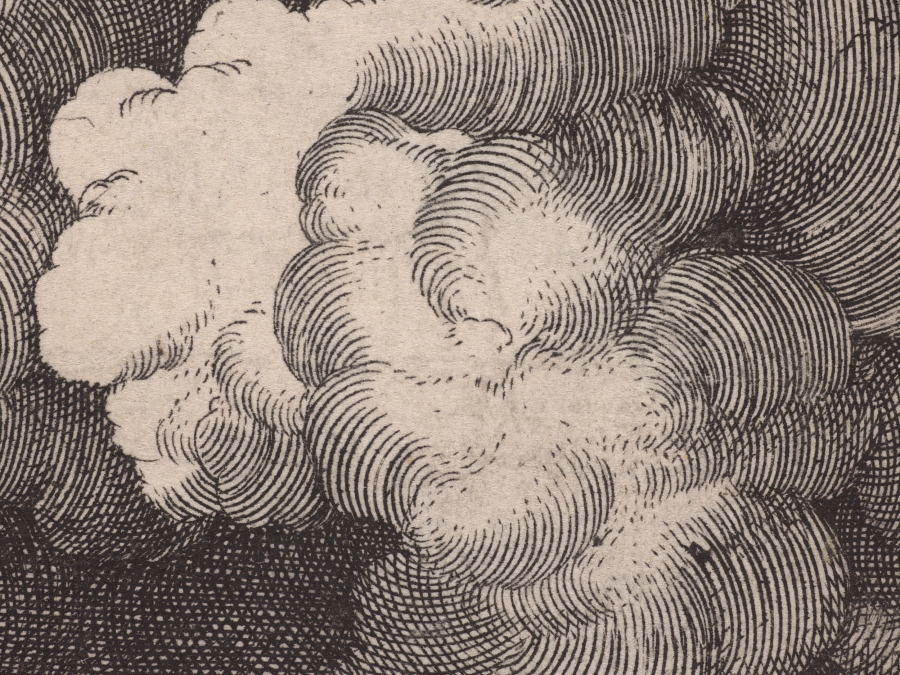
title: Christ, the Virgin, and St. John the Baptist with Saints Paul and Catherine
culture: Italy, 16th century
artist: Marcantonio Raimondi (Italian, 1470/82–1527/34)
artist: after Raphael (Italian, 1483–1520)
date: c. 1520–25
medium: engraving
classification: Print